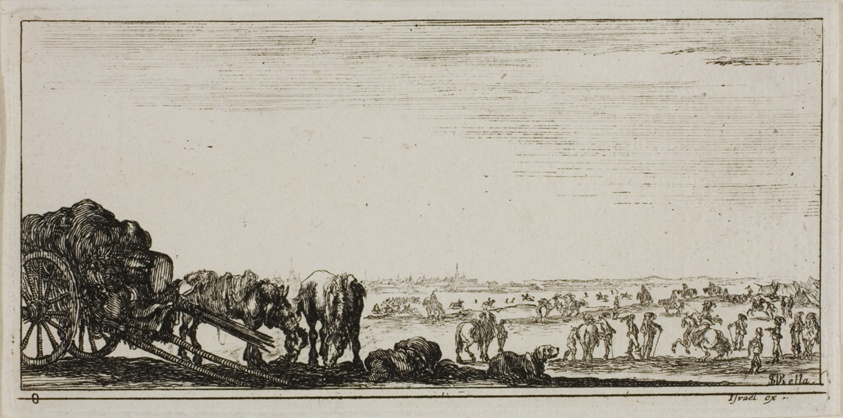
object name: Print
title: Plate Eight from Drawings of Several Movements by Soldiers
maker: Stefano della Bella (Italian, 1610-1664)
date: 1644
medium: Etching on ivory laid paper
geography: Italy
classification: etching; paper; print; prints and drawing